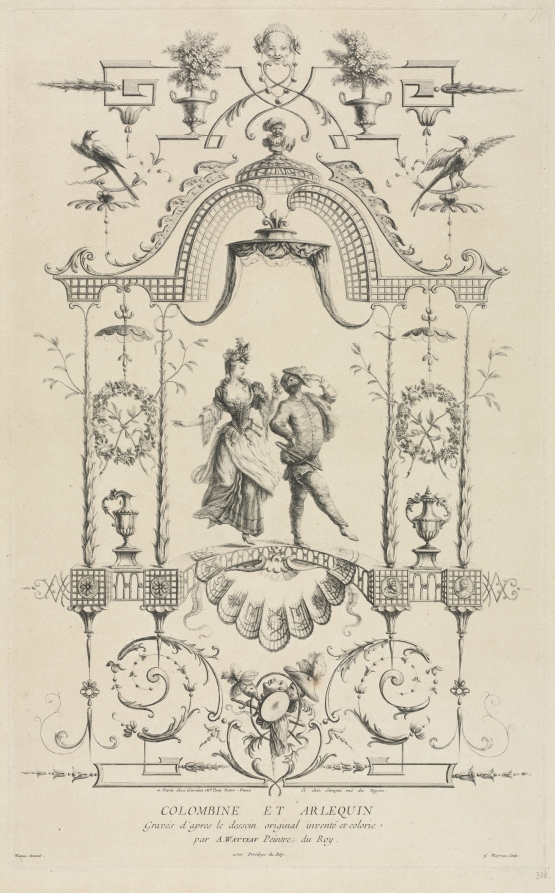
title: Columbine and Harlequin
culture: France, 18th century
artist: Jean Moyreau (French, 1690–1762)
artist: after Jean-Antoine Watteau (French, 1684–1721)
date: c. 1729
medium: etching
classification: Print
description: Arabesques (decorations with curves and tendrils inspired by plant forms) were in vogue in 18th-century France. Watteau (1684-1721) produced arabesques for the ornamentation of walls, paneling, furniture, and ceilings. He depicted popular motifs, such as the elegant courtship in an idyllic outdoor setting pictured in The Gallant, shown nearby, or as in Columbine and Harlequin, two characters from productions of the Commedia dell'arte, an Italian comic theater. Watteau launched a trend for the exotic scenes found on imported Chinese porcelains and lacquer ware about 1707. The parasol in The Gallant, and the Asian face that smiles down from the top of Columbine and Harlequin, are examples of chinoiserie, the playful imitation of Chinese art.